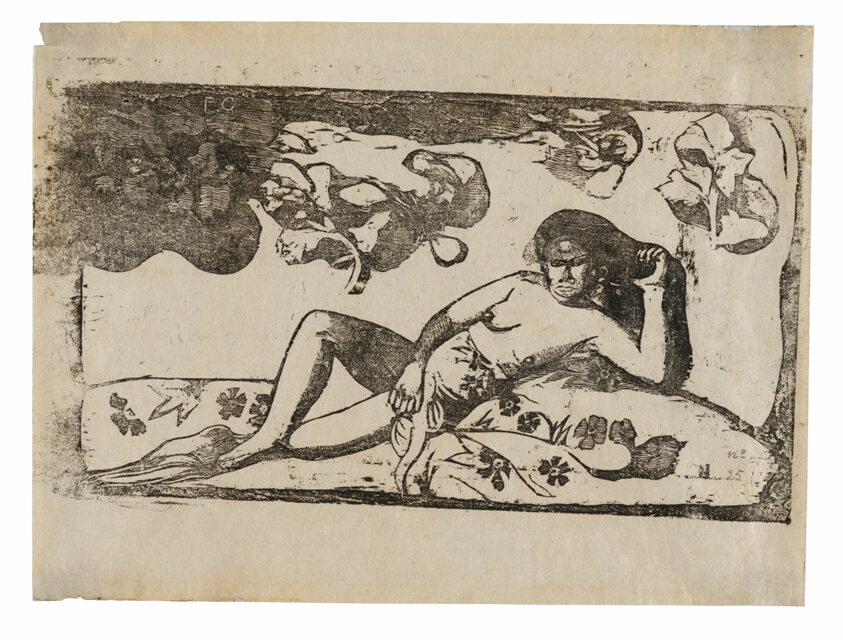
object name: Print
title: Te arii vahine—opoi (Woman with Mangos—Tired), from the Suite of Late Wood-Block Prints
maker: Paul Gauguin (French, 1848-1903)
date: 1898/99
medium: Wood-block print in black ink on thin ivory Japanese paper, partially laid down on white Japanese paper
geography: France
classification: woodcut; print; prints and drawing